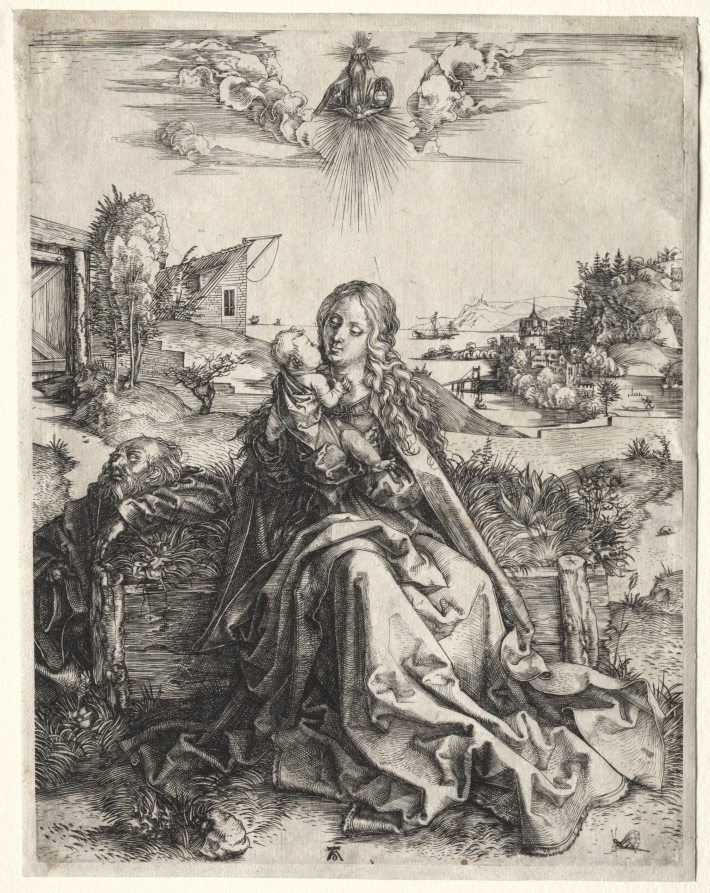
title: Holy Family with the Butterfly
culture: Germany, late 15th-early 16th Century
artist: Albrecht Dürer (German, 1471–1528)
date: c. 1495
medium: engraving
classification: Print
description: Dürer’s earliest engraving of the Virgin and Child theme features the Madonna seated on a grassy bench in an enclosed garden, a traditional subject alluding to her virginity. The divine presence of God the Father and the Holy Spirit in the form of the dove overhead reinforces her sacred role as the mother of the Messiah, while Joseph, idly napping to the side, imparts a sense of domesticity and humanity to the scene. Because Dürer returned to this theme continuously throughout his career, it is possible to track his artistic development in engraving. For example, Joseph’s awkward proportions reveal Dürer’s relative inexperience in the medium up to this point.